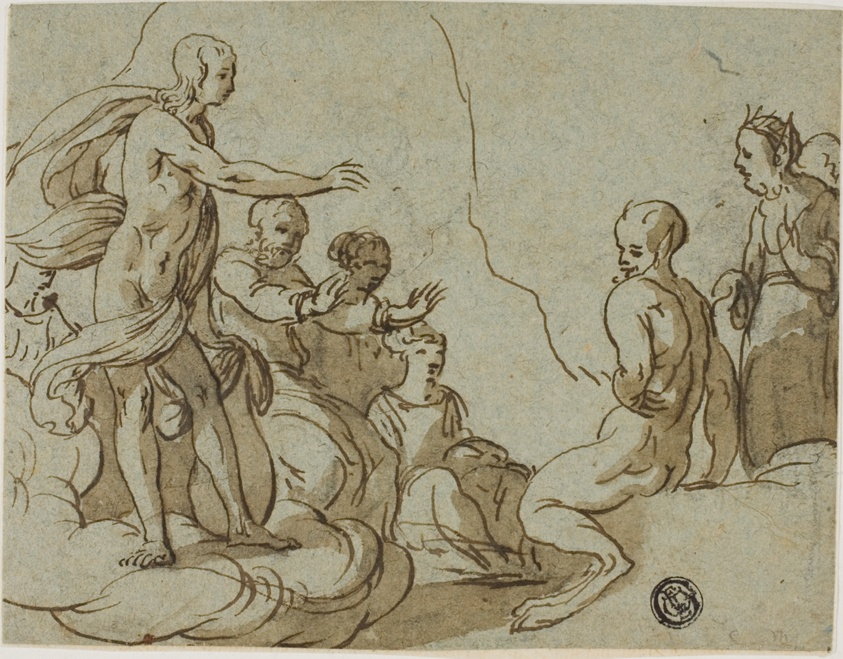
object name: Drawing and Watercolor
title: King Midas at the Contest Between Apollo and Pan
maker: Style of Abraham Jansz Diepenbeeck; Flemish, 1596-1675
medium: Pen and brown ink, with brush and brown wash, over traces of black chalk, on blue laid paper, laid down on ivory laid paper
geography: Flanders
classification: pen and ink drawings; drawings (visual works); prints and drawing